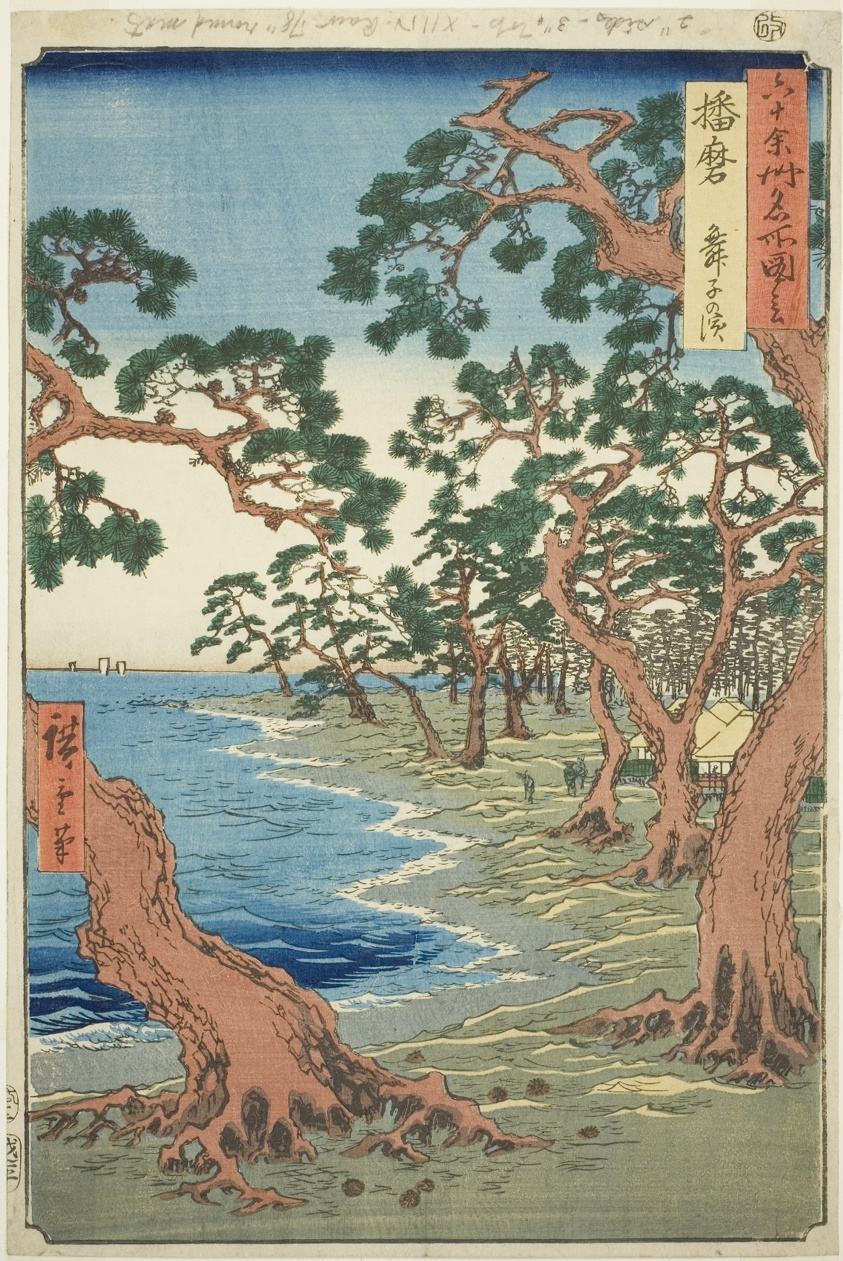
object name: Print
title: Harima Province: Maiko Beach (Harima, Maiko no hama), from the series "Famous Places in the Sixty-odd Provinces (Rokujuyoshu meisho zue)"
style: Japanese (culture or style)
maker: Utagawa Hiroshige 歌川 広重; Japanese, 1797-1858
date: 1853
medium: Color woodblock print; oban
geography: Japan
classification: woodblock print; print; asian art